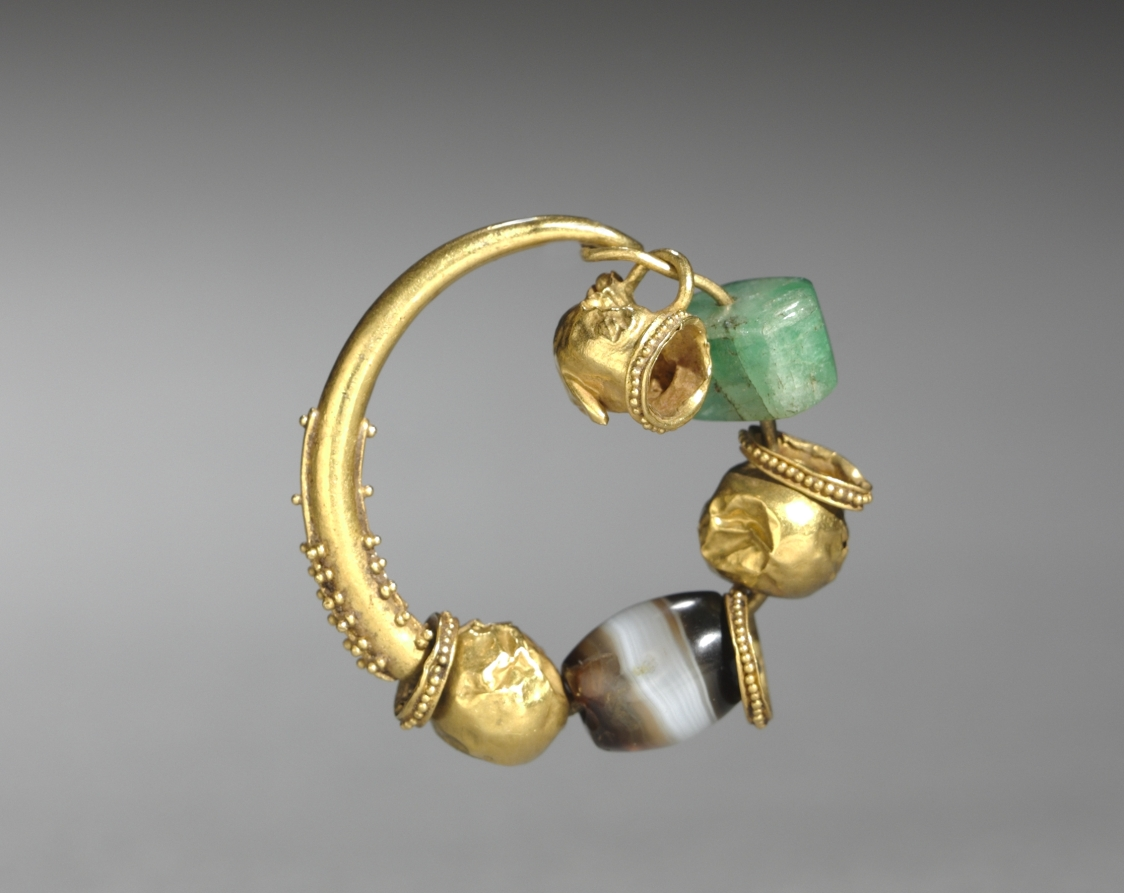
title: Earring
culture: Cyprus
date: 500–400 BCE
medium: gold and agate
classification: Jewelry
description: This earring is made of a simple gold loop with gold, agate, and feldspar beads strung on it. One of the gold beads is in the shape of a dolphin’s upper body with a small ball in its mouth. Earrings were extremely popular throughout the ancient Mediterranean, often decorated with animal heads like dolphins, bulls, and goats.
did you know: The use of agate in jewelry dates to the Indus Valley Civilization, between 3300 and 1300 BCE.